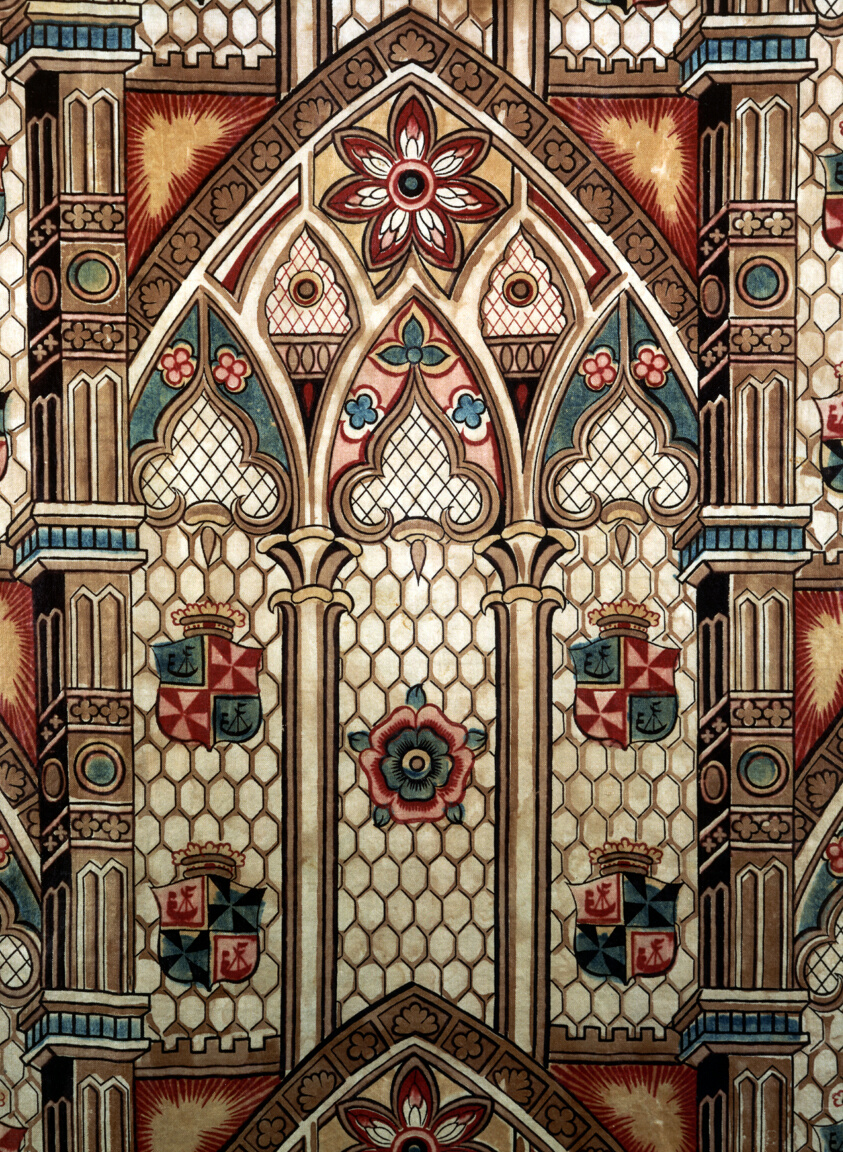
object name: Textile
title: Gothic Arches (Furnishing Fabric)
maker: England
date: 1830/35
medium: Cotton, plain weave; roller and possibly block printed; glazed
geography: England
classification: textile; weaving - printed; furnishing textile